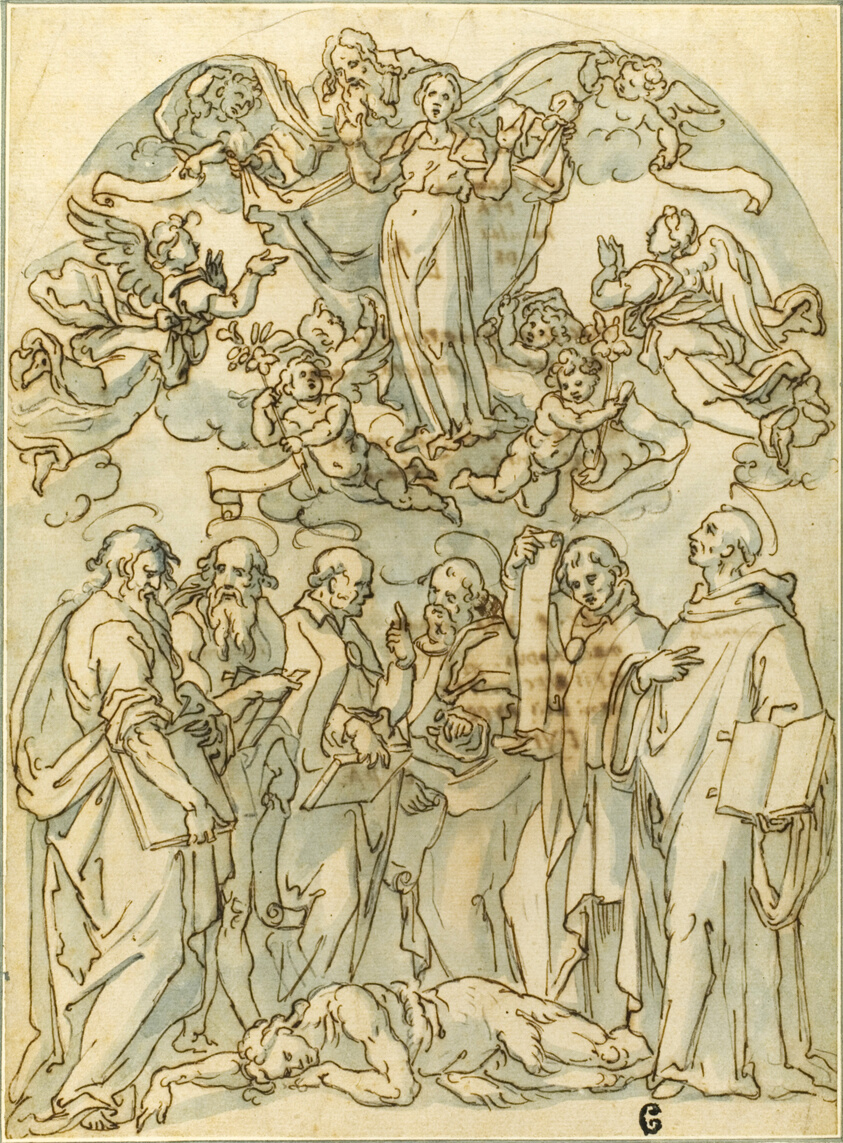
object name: Drawing and Watercolor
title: Virgin in Glory with Saints including St. John at their Feet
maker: After Lazzaro Tavarone; Italian, 1556-1641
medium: Pen and brown ink with brush and blue wash, over black chalk, on buff laid paper, laid down on card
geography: Italy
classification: drawings (visual works); prints and drawing